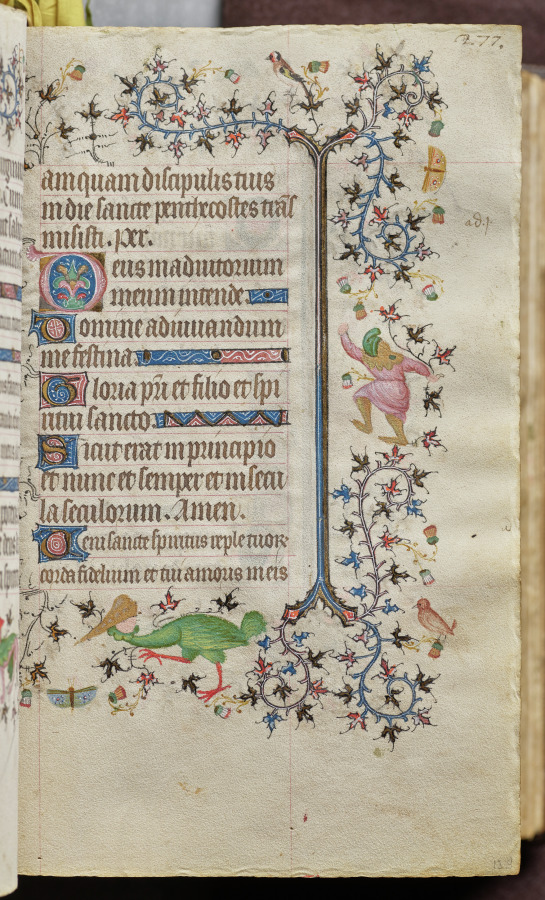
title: Hours of Charles the Noble, King of Navarre (1361-1425): fol. 139r, Text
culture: France, Paris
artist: Master of the Brussels Initials and Associates (French)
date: c. 1405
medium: ink, tempera, and gold on vellum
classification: Bound Volume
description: This precious volume was obviously highly prized by its owner, the French-born King of Navarre, who had his coat of arms painted on no less than twenty folios. Rather than directly commissioning this manuscript from a specific workshop, it seems that Charles the Noble acquired his book of hours -- perhaps ready-made for the luxury market -- while on a trip to Paris in 1404-05. A collaborative effort, six painting styles are evidenced within the pages of this codex, those of two Italians, two Frenchmen, and two Netherlanders. The painter who was responsible for the planning and decoration of the book, and who produced seventeen of the large miniatures, was a Bolognese artist known as the Master of the Brussels Initials. His principal assistant, responsible for most of the borders, was a Florentine who signed his name "Zecho" da Firenze on folio 208 verso.